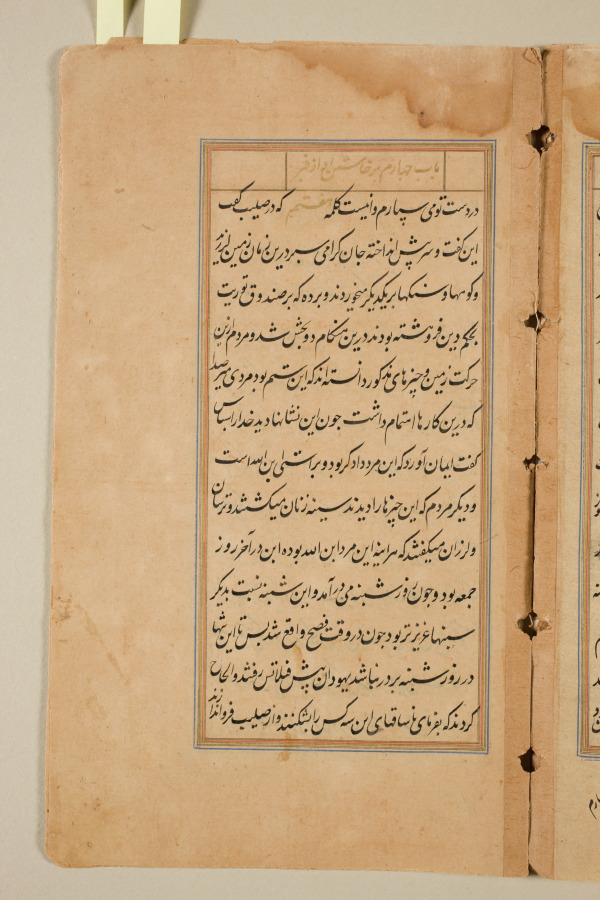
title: Text page from a Mirror of Holiness (Mir’at al-quds) of Father Jerome Xavier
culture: Mughal India, Allahabad, made for Prince Salim (1569–1627)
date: 1602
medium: Ink and gold on paper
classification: Manuscript